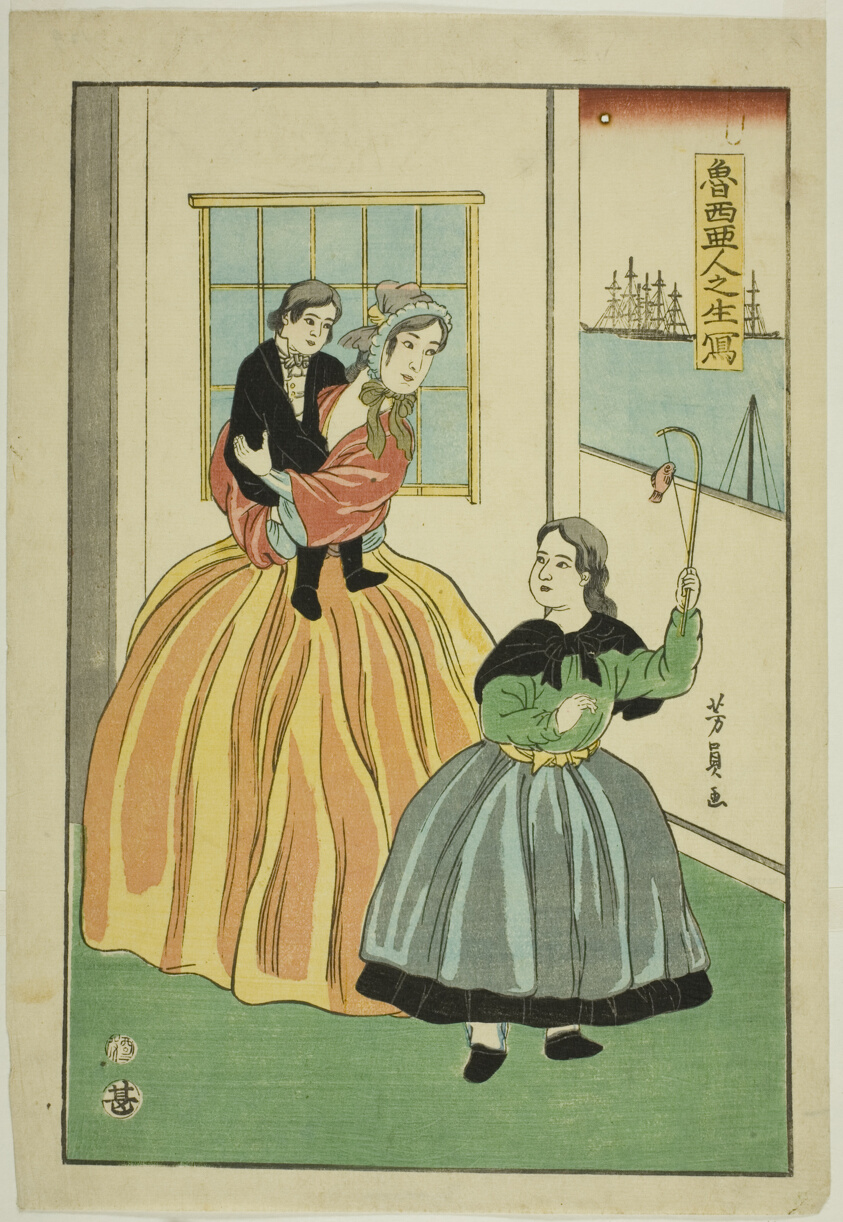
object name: Print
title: Russians Drawn from Life (Oroshiajin no sho utsushi)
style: Japanese (culture or style)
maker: Utagawa Yoshikazu (Japanese, active c. 1850–70)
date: 1861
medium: Color woodblock print; oban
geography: Japan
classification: woodblock print; print; asian art